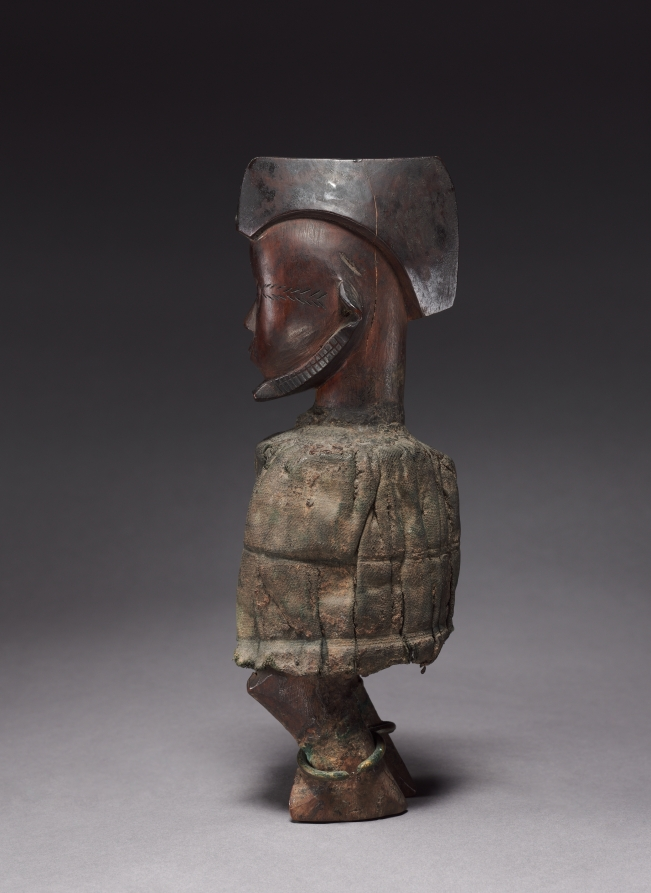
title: Male Figure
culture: Africa, Central Africa, Republic of the Congo or Democratic Republic of the Congo, Teke-style maker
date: late 1800s-early 1900s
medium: Wood, cloth, organic material, and copper alloy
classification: Sculpture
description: This figure was the Delennes' first African art acquisition. They purchased the work in Paris in 1958—the year they were married—from the then leading French dealer Henri Kamer. The couple's interest in African art, which also inspired this particular acquisition, was triggered by their visit to the Congolese pavilion at the Brussels world's fair that same year. This experience made a lasting impression and triggered a lifelong appreciation for the art of what was then still the Belgian Congo. Although Odette later admitted that she knew that this figure was not the best example of Teke art, she and her husband held on to it because it served as a personal souvenir of their meeting each other.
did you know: This figure was the Delennes' first African art acquisition; it symbolized Rene and Odette’s first meeting.